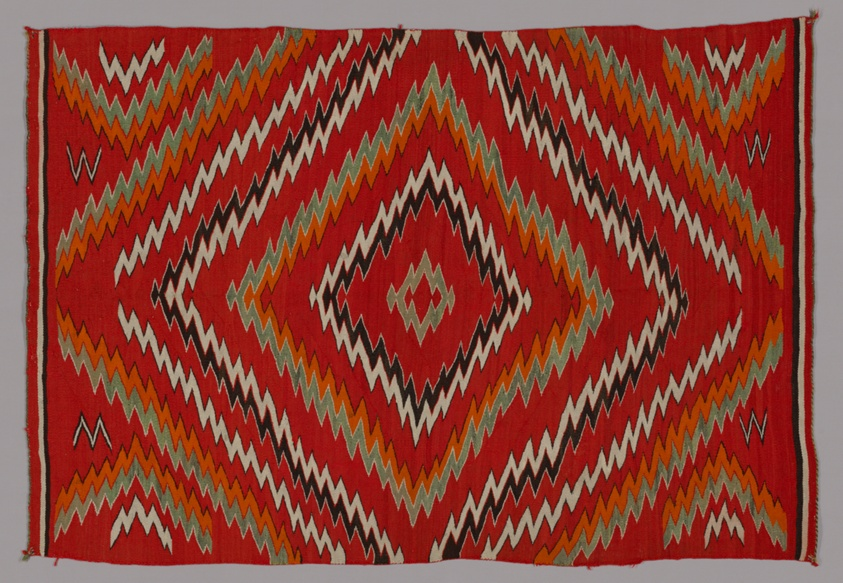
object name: Textile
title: Wearing Blanket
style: navajo, native american, americas, Arts of the Americas, indigenous, north american, native north american, eye-dazzler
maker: Unknown weaver; Navajo (Diné), active late 19th century; Navajo Nation (parts of Arizona, New Mexico, and Utah)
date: c. 1885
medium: Wool, wedge tapestry weave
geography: Navajo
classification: blanket (covering); textile; art of the americas; costume; weaving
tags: geometric motif, zigzags